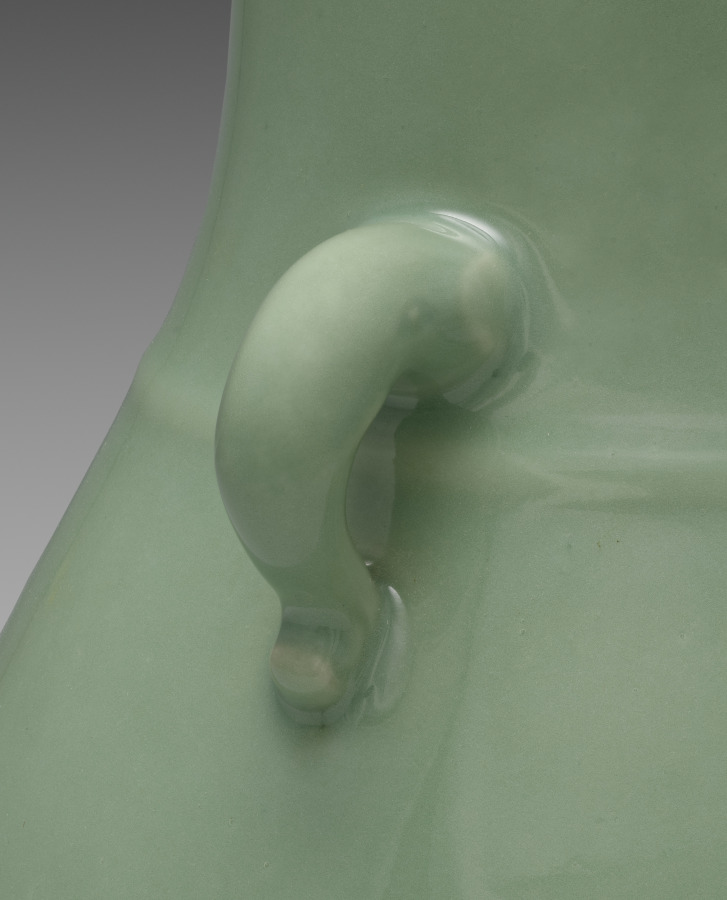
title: Hu-Shaped Vase with Handles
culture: Japan, Taishō period (1912–26) or Shōwa period (1926–89)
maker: Seifū Yohei IV (Japanese, 1872–1951)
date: 1914–46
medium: Porcelain with molded and carved design and green glaze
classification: Ceramic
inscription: 清風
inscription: 成山清風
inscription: 清風造【印】清風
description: Many of the vases created by Yohei III and IV were made with reference to and in emulation of Chinese ceramics in both form and glazing. The Seifu studio was inspired by later Chinese copies of two other archaic vessel types, the hu (Japanese ko) and guan (Japanese kan). In simple terms, in their original contexts, the hu and guan were storage jars that also appeared in ritual contexts. This hu-form vase by Yohei IV has a green glaze and handles in the shape of an elephant head. The details of the elephant heads are quite easy to miss, but a close look reveals that each has carved eyes with pupils defined, tiny ears and tusks in very low relief, and a curved trunk with the end curled up. This sort of container is even known as the “elephant ear” type. The only other decorative element on the vase’s pear-shaped body is a raised cordlike band around the shoulders.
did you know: The handles are shaped like elephant heads.